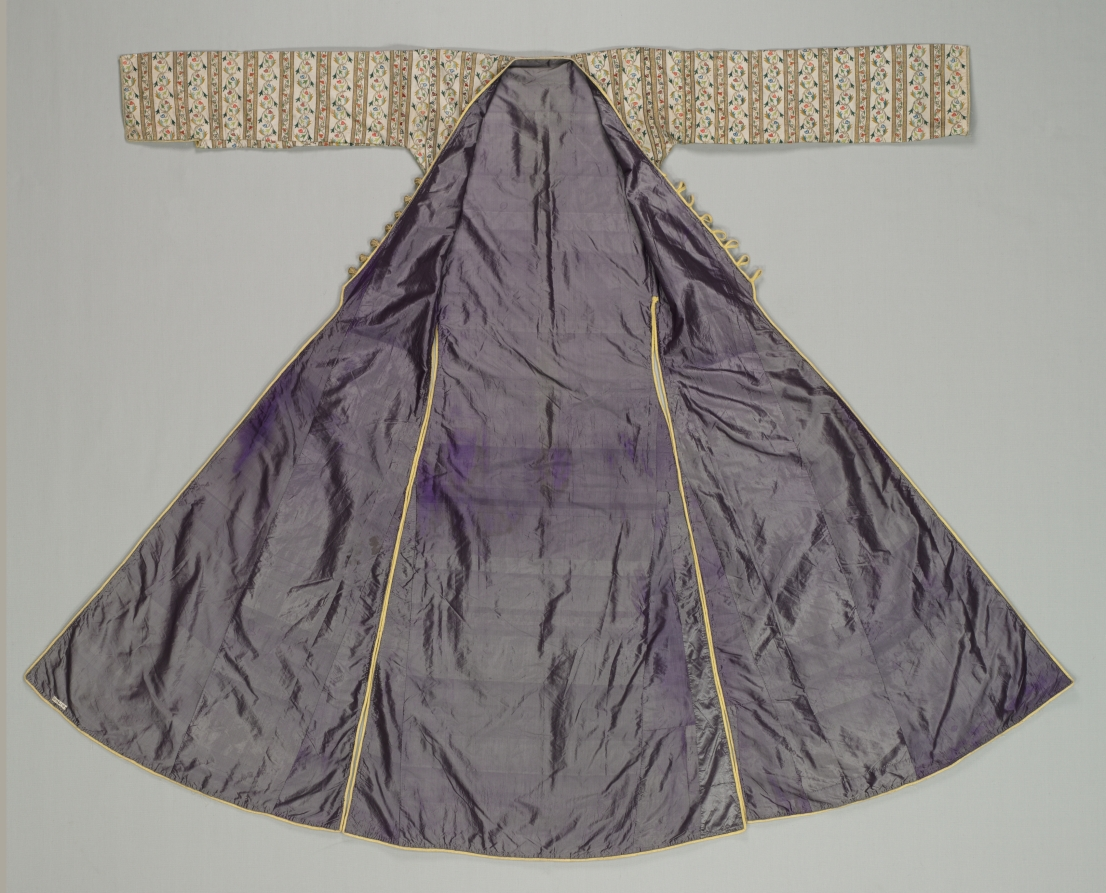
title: Woman's robe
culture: Turkey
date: 1800s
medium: striped fabric; plain weave: silk; embroidery, chain stitch: silk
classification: Garment